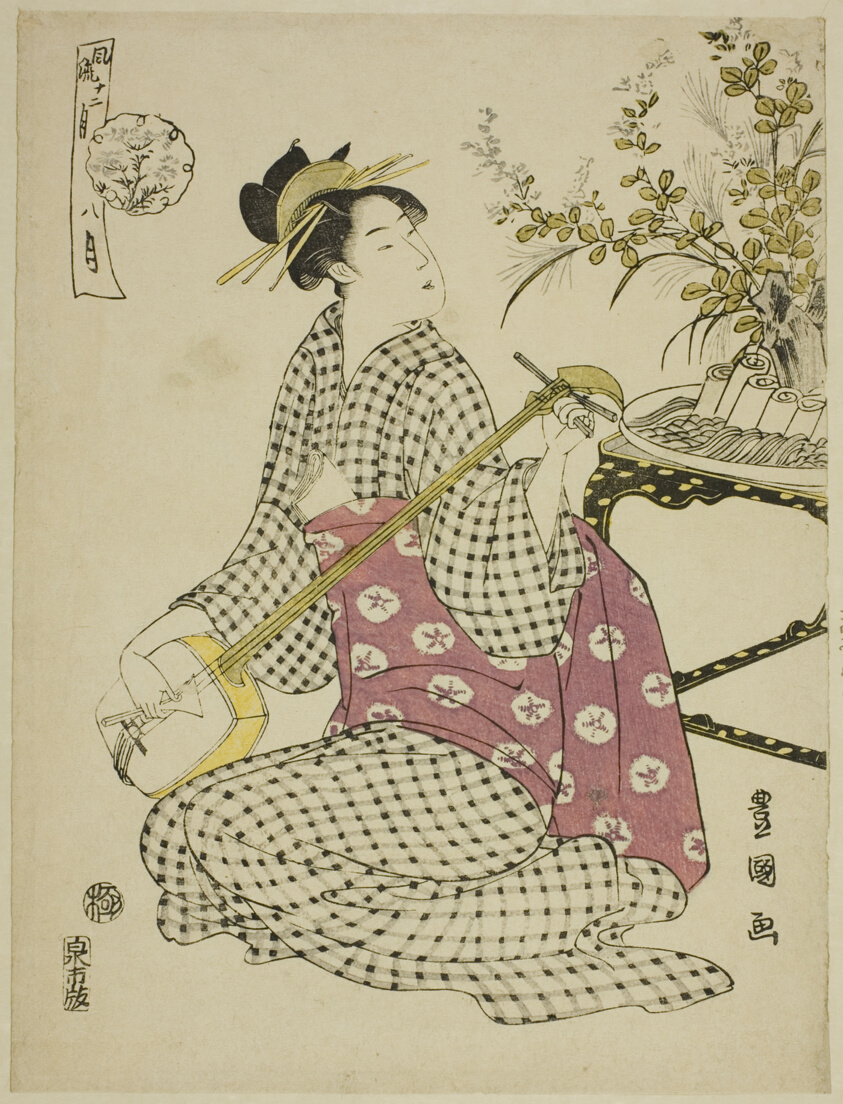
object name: Print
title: The Eighth Month (Hachi gatsu), from the series "Fashionable Twelve Months (Furyu junikagetsu)"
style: Japanese (culture or style)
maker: Utagawa Toyokuni I 初代 歌川 豊国; Japanese, 1769–1825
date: c. 1793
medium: Color woodblock print; chuban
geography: Japan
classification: woodblock print; print; asian art